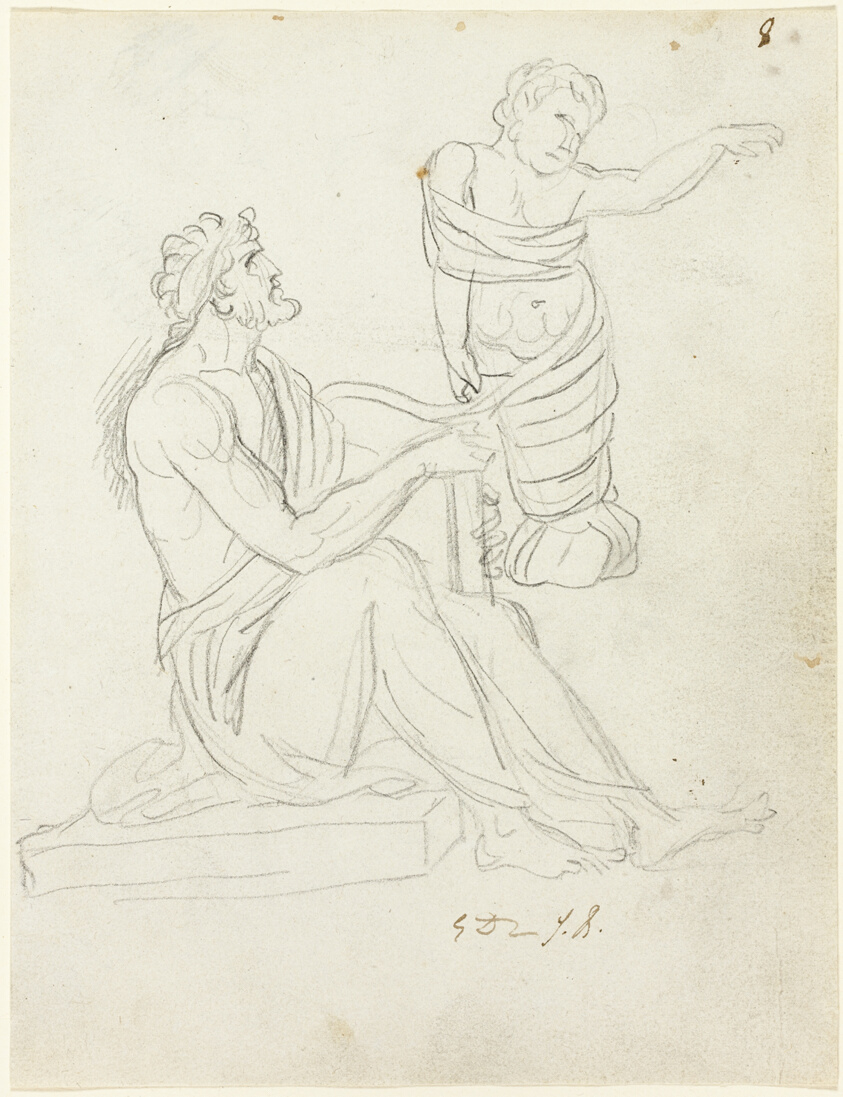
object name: Drawing and Watercolor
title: Seated Man and Swaddled Baby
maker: Jacques-Louis David; French, 1748-1825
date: c. 1810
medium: Graphite on ivory wove paper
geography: France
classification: graphite; drawings (visual works); prints and drawing